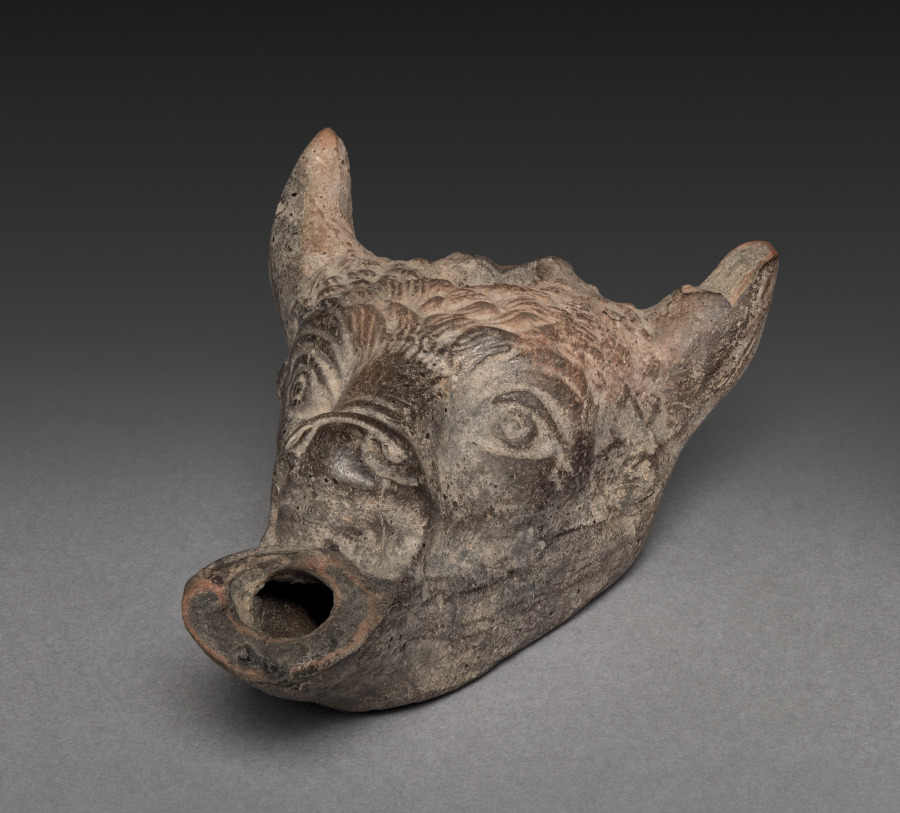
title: Bull's-head Lamp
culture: Greece, Greco-Roman Period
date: 100 BCE–100 CE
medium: Nile silt clay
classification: Vessels